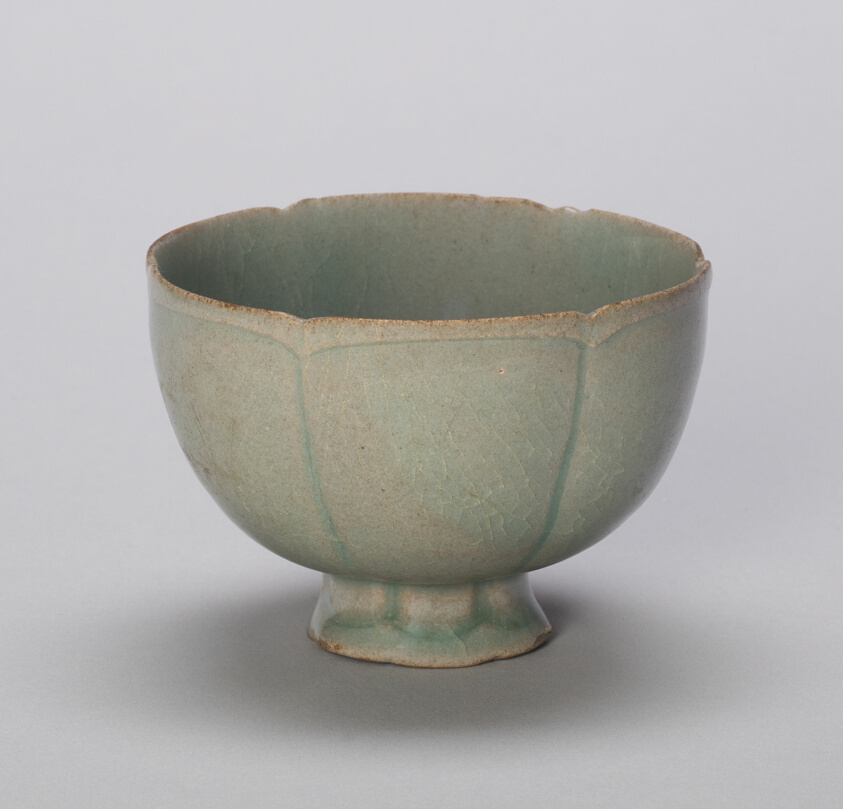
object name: Vessel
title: Lobed Cup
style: Chinese (culture or style)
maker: Korea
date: Goryeo dynasty (918–1392), 12th century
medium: Stoneware with underglaze molded decoration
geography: South Korea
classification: drinking vessel; ceramics; vessel